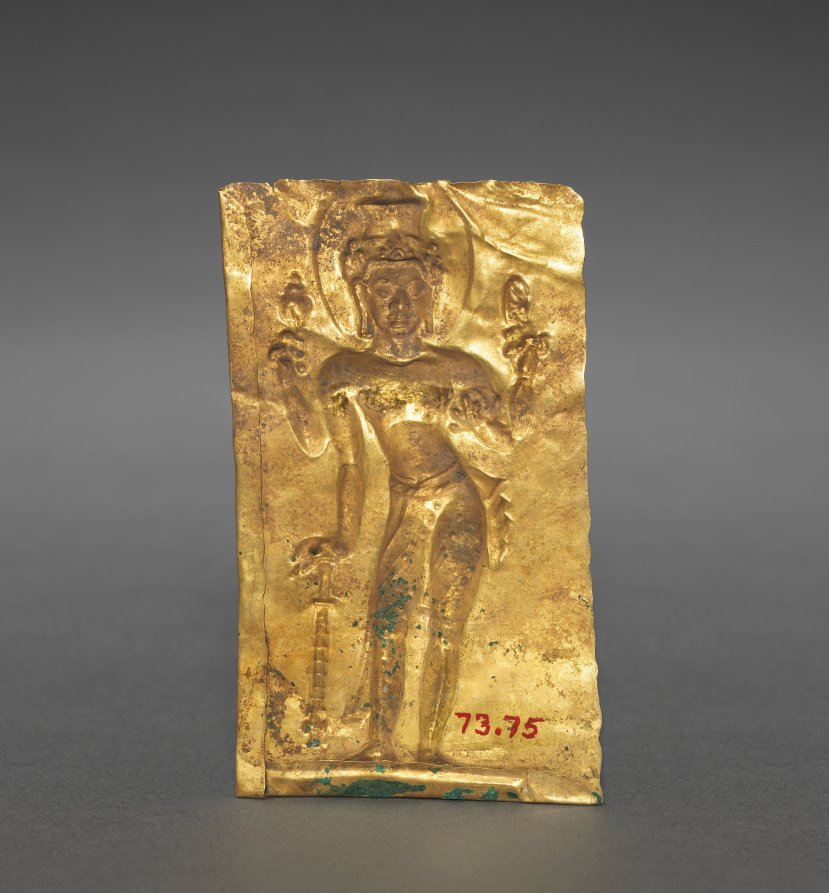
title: Plaque with Vishnu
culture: Thailand, Sri Deb Style, Mon-Dvaravati period, c. 7th-8th Century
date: c. 600s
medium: gold repoussé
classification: Metalwork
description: Images made in India during the Gupta period (AD 300s to 600s) were influential in shaping the early development of Buddhist and Hindu art in Southeast Asia. This gold token depicts the Hindu god Vishnu, identified by the flat-topped crown, his four arms, and attributes: wheel, conch shell, club, and clod of earth. Noteworthy for its naturalism is the foreshortening of his right foot. Such precious gold objects were made to be secreted under a sacred stone icon in Thailand or Cambodia to infuse the temple with wealth and glory.